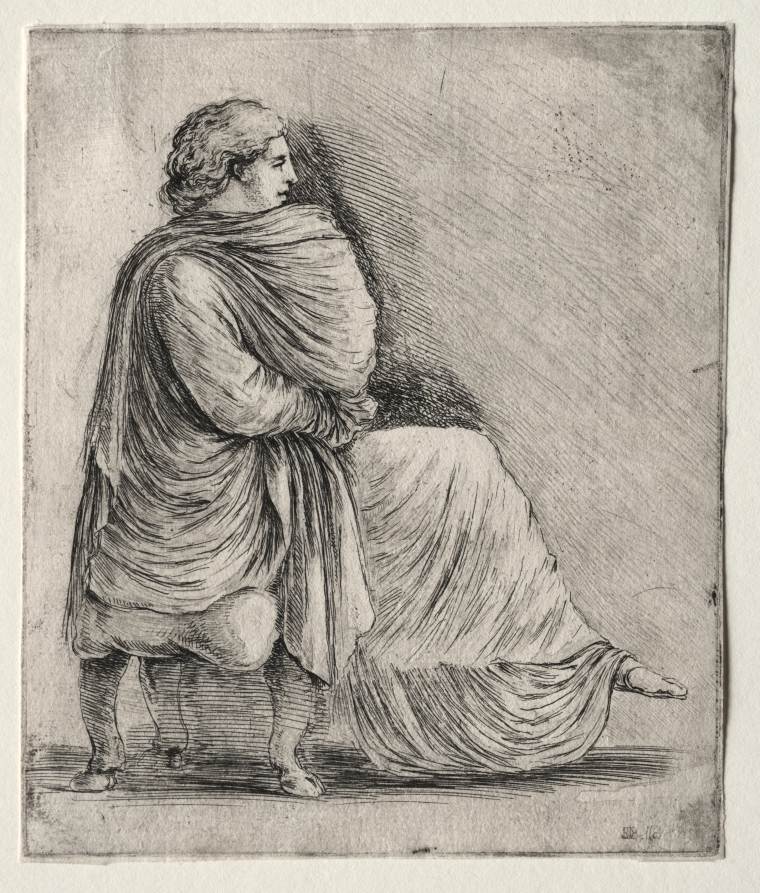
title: Woman Seated on a Stool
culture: Italy, 17th century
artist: Stefano Della Bella (Italian, 1610–1664)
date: c. 1660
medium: etching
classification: Print